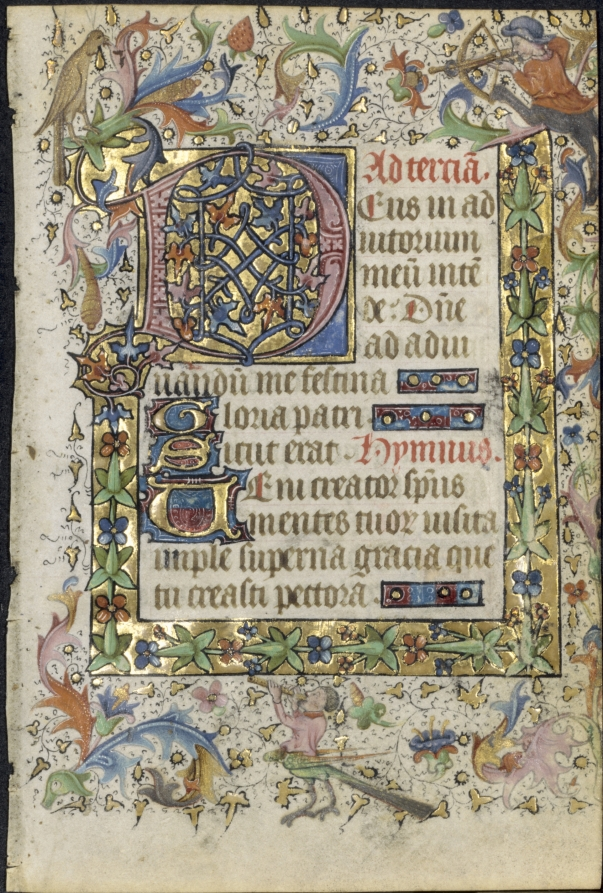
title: Leaf from a Book of Hours: Decorated Initial D[eus] with Foliated Border (Opening of Terce: Hours of the Holy Spirit)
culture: Flanders, Ghent?, 15th century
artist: Master of Guillebert de Mets (Flemish)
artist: and Workshop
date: 1430s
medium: ink, tempera and gold on vellum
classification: Manuscript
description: The Master of Guillebert de Mets (probably Jean de Pestivien) is named after the scribe who recorded his name in an illuminated copy of the Decameron (a collection of stories by Giovanni Boccaccio, written 1351–53) made for Duke Philip the Good of Burgundy, and for which the artist contributed several miniatures. The Master of Guillebert de Mets was active from about 1410 to 1445. So far there is no proof that allows us to follow his career or to know precisely where he worked. Some evidence, however, hints that he was of Flemish origin. The artist painted in an easily recognizable style. His figures have prominent heads with clearly delineated eyes and small mouths, slender torsos with thin, spindly legs, and long, finely worked fingers. Many of his miniatures, such as the Crucifixion and Last Judgment here, show that he often favored mosaic backgrounds of delicately worked checkered patterns.